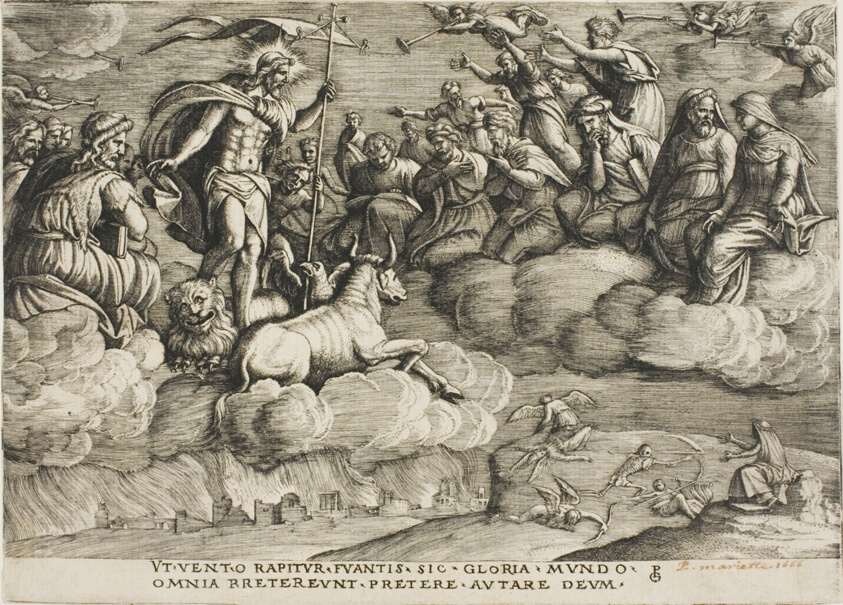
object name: Print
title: The Triumph of Eternity, plate six from The Triumphs of Petrarch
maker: Georg Pencz (German, c. 1500-1550)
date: c. 1539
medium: Engraving in black on ivory laid paper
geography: Germany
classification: engraving; print; prints and drawing